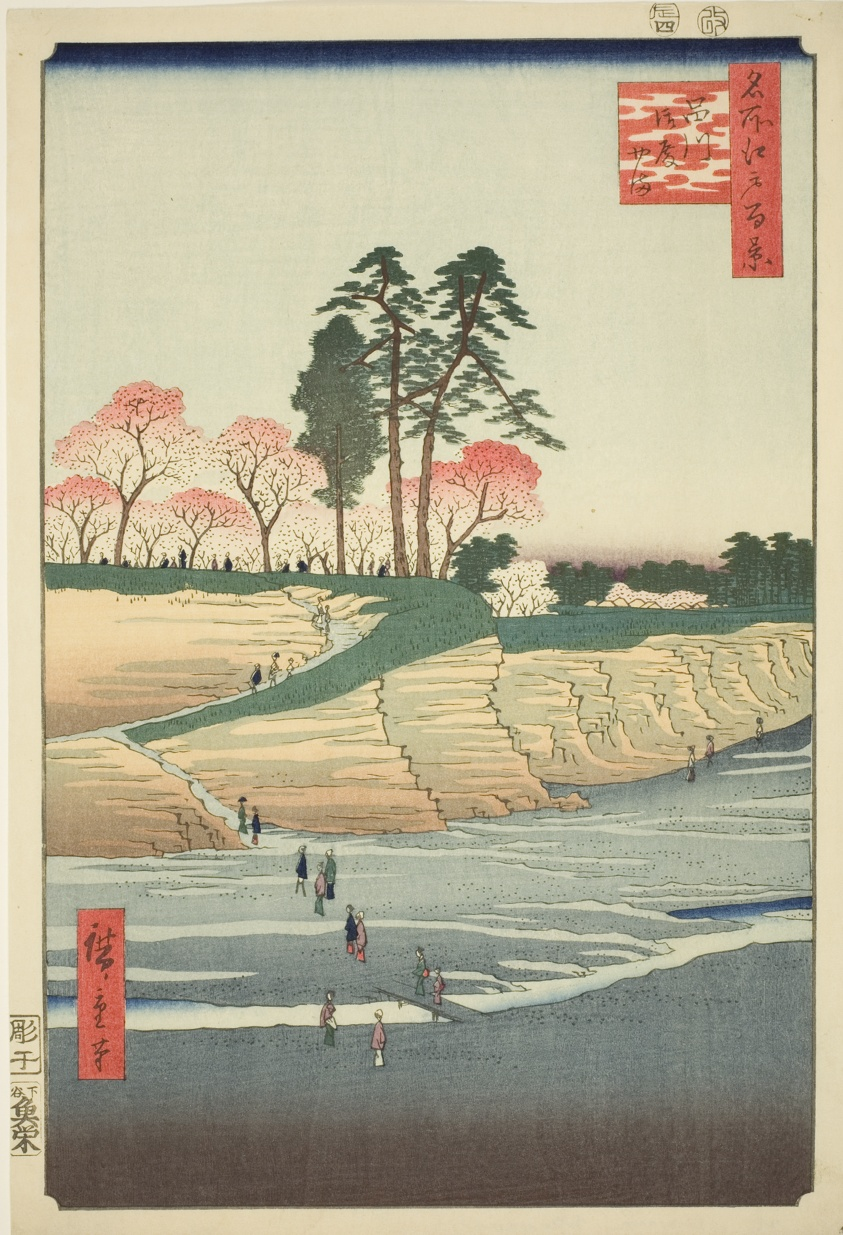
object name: Print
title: Goten Hill at Shinagawa (Shinagawa Gotenyama), from the series One Hundred Famous Views of Edo (Meisho Edo hyakkei)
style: Japanese (culture or style)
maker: Utagawa Hiroshige 歌川 広重; Japanese, 1797-1858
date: 1856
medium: Color woodblock print; ōban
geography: Japan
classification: woodblock print; print; asian art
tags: landscapes